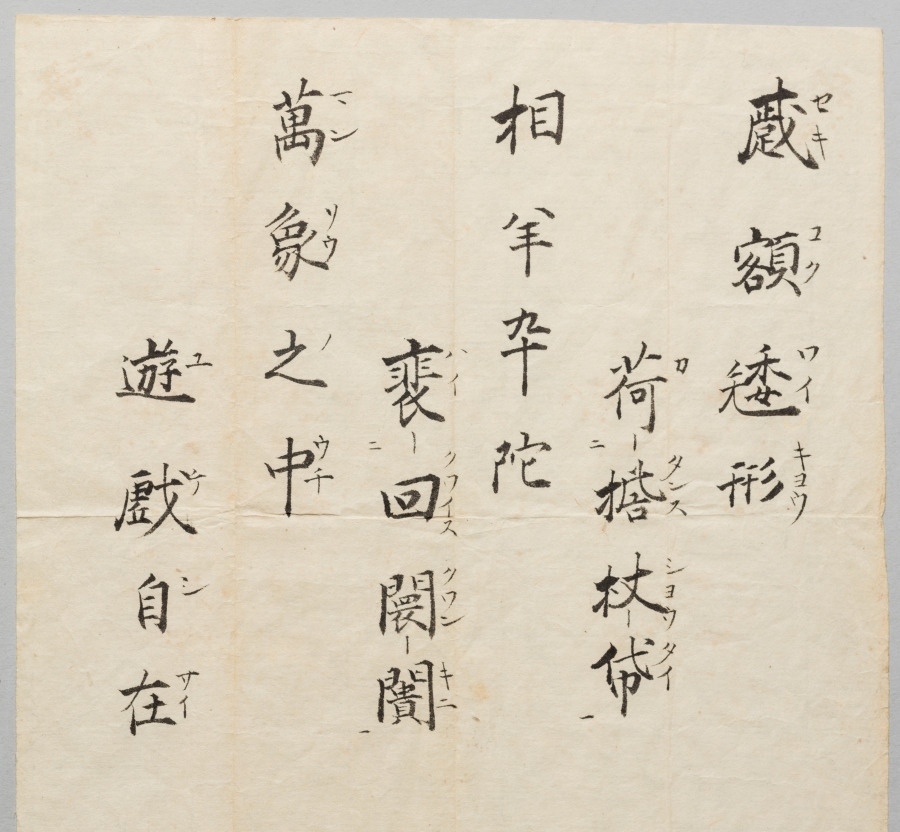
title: Mountain and River in Storm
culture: Japan, Edo period (1615–1868)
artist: Hirowatari Setsuzan (Japanese, ?-1674)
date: early to mid-1600s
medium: hanging scroll; ink on paper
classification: Painting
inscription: signed: Setsuzan hitsu